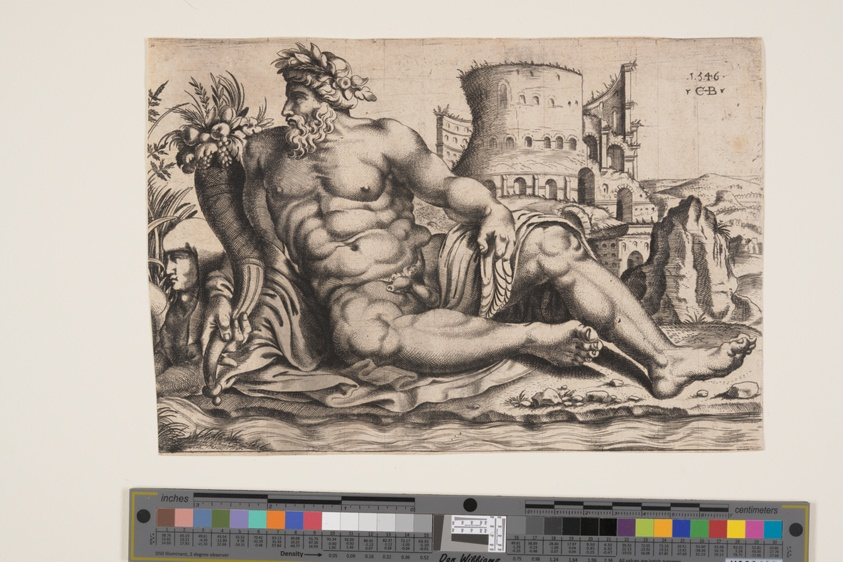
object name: Print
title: The River Nile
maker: Cornelis Bos (Flemish, c. 1510–before 1566)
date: 1546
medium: Engraving on paper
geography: Flanders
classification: engraving; paper; print; prints and drawing